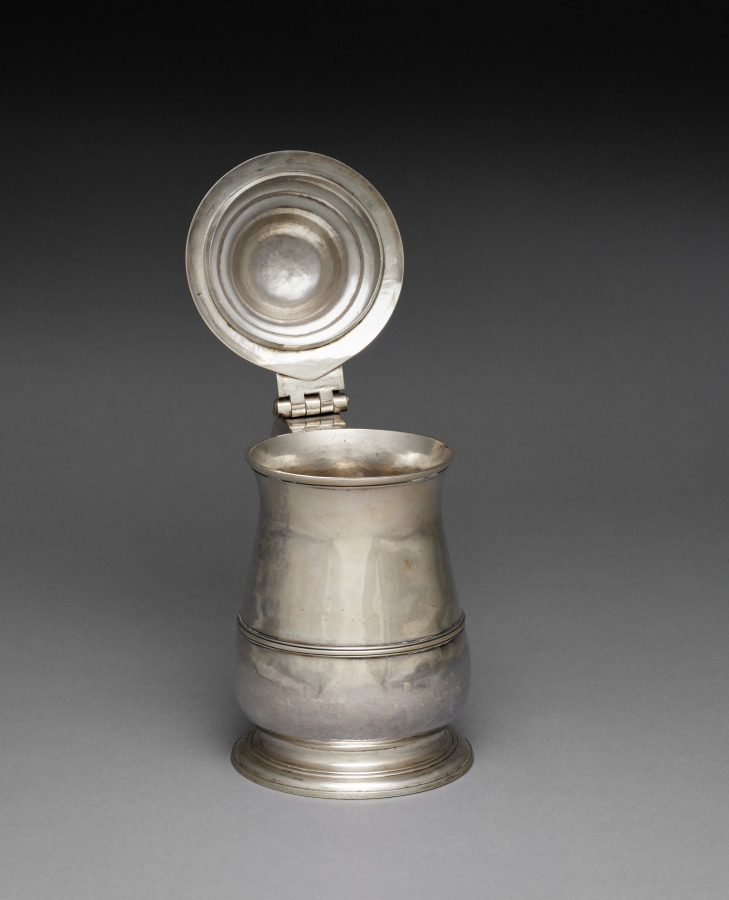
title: Tankard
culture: England, 18th century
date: c. 1760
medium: silver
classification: Silver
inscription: Scratched underside: "11 oz 13 'u 10".